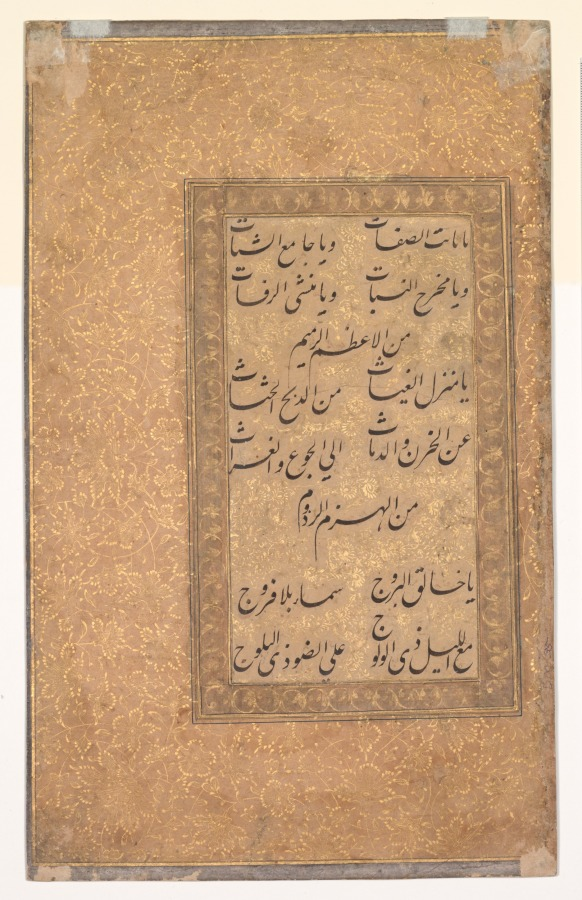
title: Calligraphy of a Pious Invocation in Rhyme (verso)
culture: India, Mughal, 16th century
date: 1500s or 1600s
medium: Gum tempera, ink, and gold on paper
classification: Painting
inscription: Arabic verses in nasta‘liq script: O Immutable in Your attributes!/ O Gatherer of that which is dispersed!/ You who make plants bloom;/ You who quicken the dead from decayed bones;/ You who send down succor/ From those bowing and kneeling/ To the grieving and sick/ To the hungry and famished/ From the routing and flooding,/ O Creator of the constellations,/ In the seamless heavens/ From the onset of night/ To the brightening of the light of dawn.